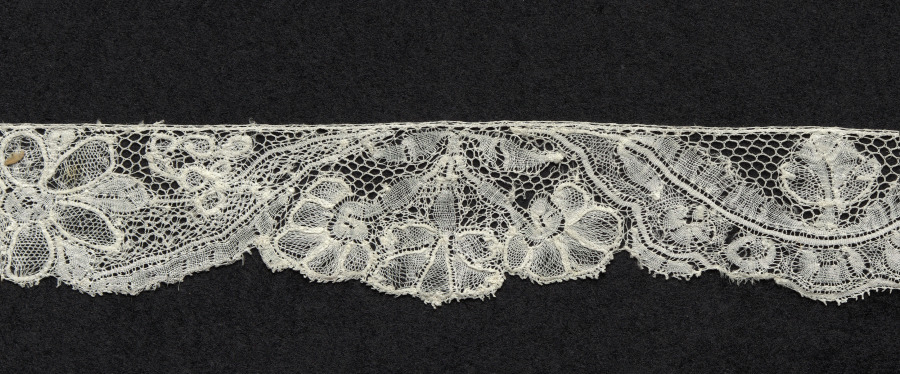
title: Lace Edging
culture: Belgium, Brussels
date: 1740–60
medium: Bobbin lace (Point d'Angleterre)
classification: Lace